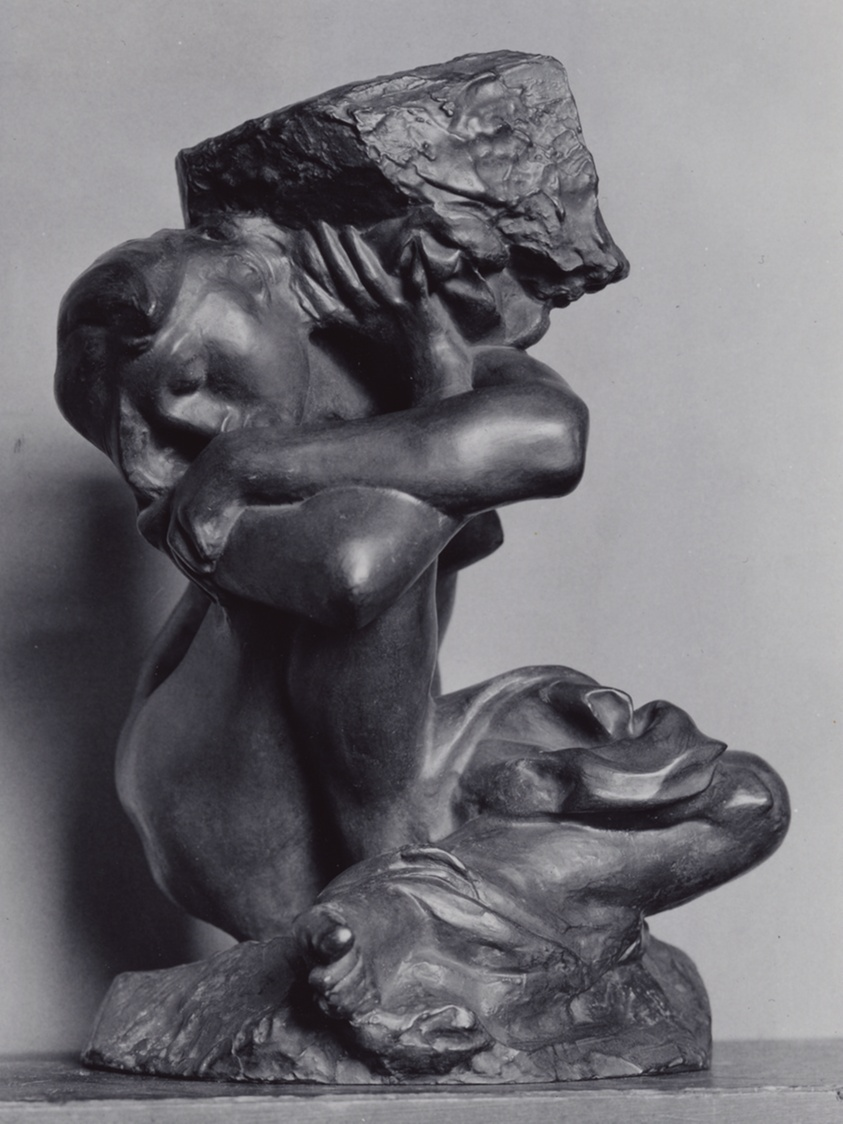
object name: Sculpture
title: The Fallen Caryatid Carrying Her Stone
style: nineteenth century, 19th century, 20th Century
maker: Auguste Rodin (French, 1840–1917)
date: Modeled 1881–82, cast 1902/24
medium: Bronze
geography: France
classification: statuette; sculpture; bronze; figure; french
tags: woman, nudes, stone, Greece